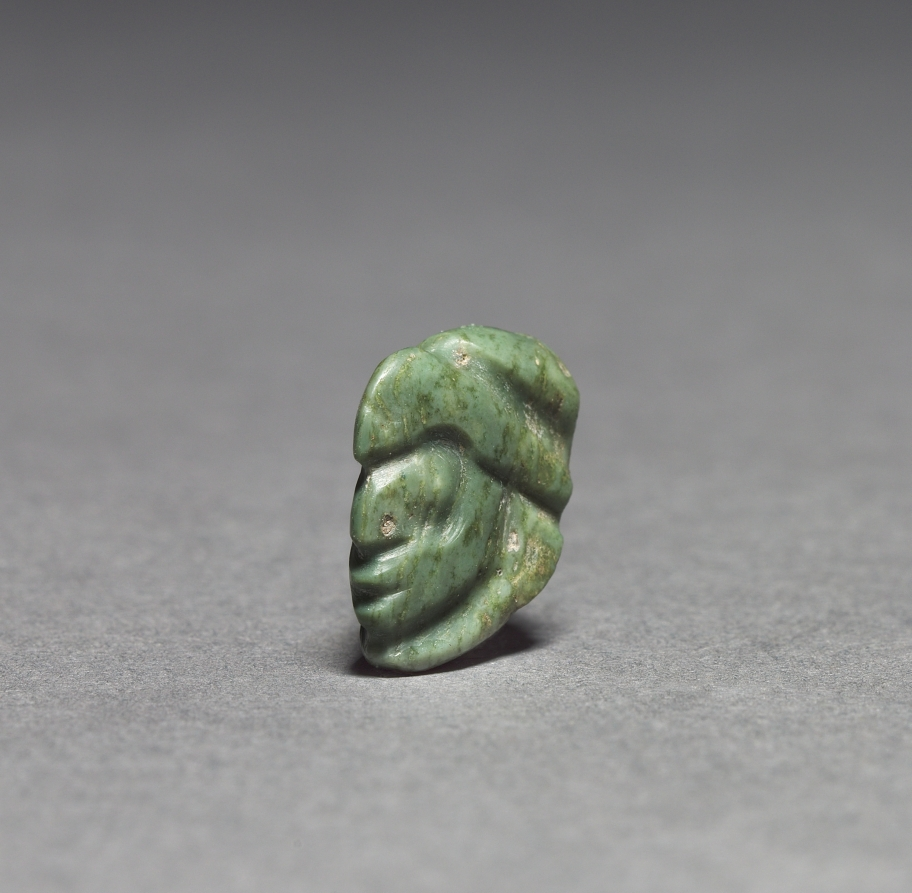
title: Head in Bird's Beak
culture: Mexico, Oaxaca, Mixtec(?)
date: before 1990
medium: serpentine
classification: Sculpture